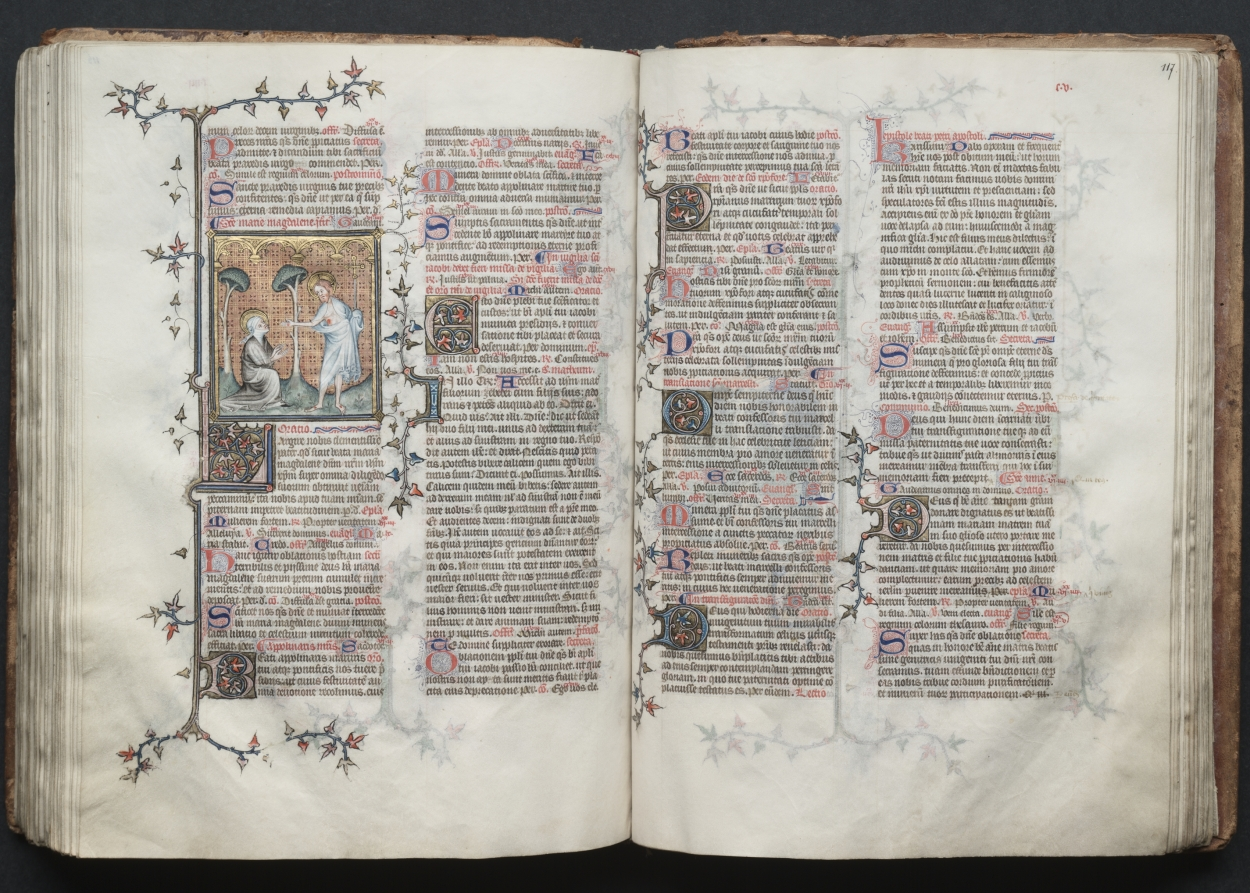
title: The Gotha Missal: Fol. 116v, St. Mary Magdalene Kneels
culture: France, Paris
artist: Master of the Boqueteaux (French)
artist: and Workshop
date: c. 1375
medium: ink, tempera, and gold on vellum; blind-tooled leather binding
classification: Bound Volume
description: The style and quality of this manuscript's decoration is typical of deluxe Parisian books made for aristocratic or royal patrons. Most of the book's decoration appears to be the work of the Master of the Boqueteaux, an artist active at the court of King Charles V (died 1380). His style was apparently shared by a number of book illuminators working in and around Paris. It is very possible that the Gotha Missal belonged to Charles V, but is not provable because the manuscript has no royal portraits and lacks a colophon. Given the book's magnificent decoration, however, it would seem that it was produced for a Valois prince, if not for the king himself. The manuscript receives its name from the German dukes of Gotha, its later owners.